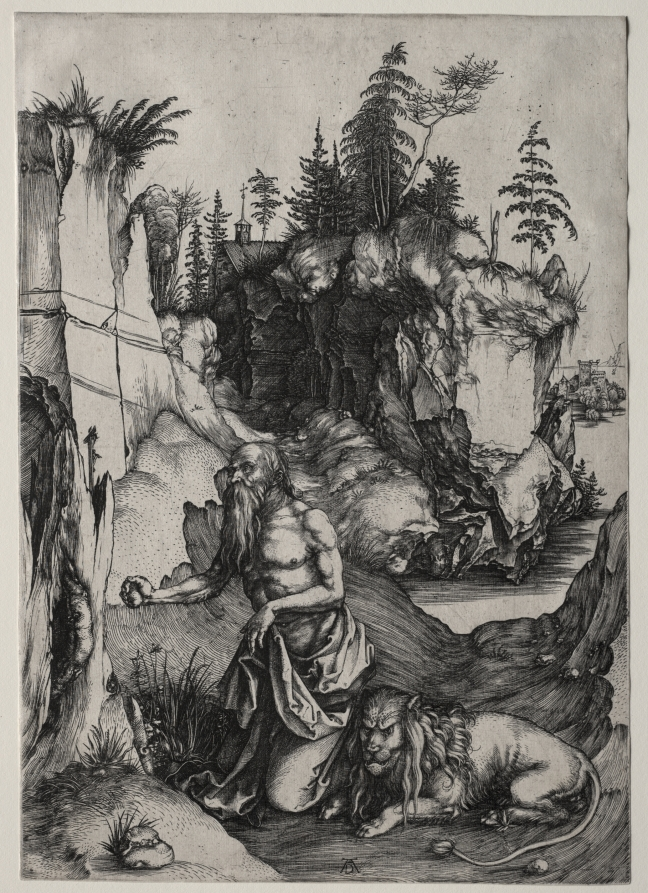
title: St. Jerome in Penitence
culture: Germany, late 15th Century early 16th Century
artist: Albrecht Dürer (German, 1471–1528)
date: c. 1497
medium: engraving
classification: Print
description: This print shows Albrecht Dürer’s interpretation of Saint Jerome in the wilderness. In this image, the saint is a gaunt penitent who kneels in front of a small crucifix placed on top of a tree stump (a reference to Christ’s cross and the tree of knowledge), while holding a rock in his right hand. Jerome was said to have beat his chest with a rock to alleviate his frequent hallucinations. Dürer included several different plant species, all Northern European in origin, displaying his dedication to the careful study and depiction of real plants.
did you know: According to legend, after he aided a lion by pulling a thorn from its paw, it became Saint Jerome's permanent companion.